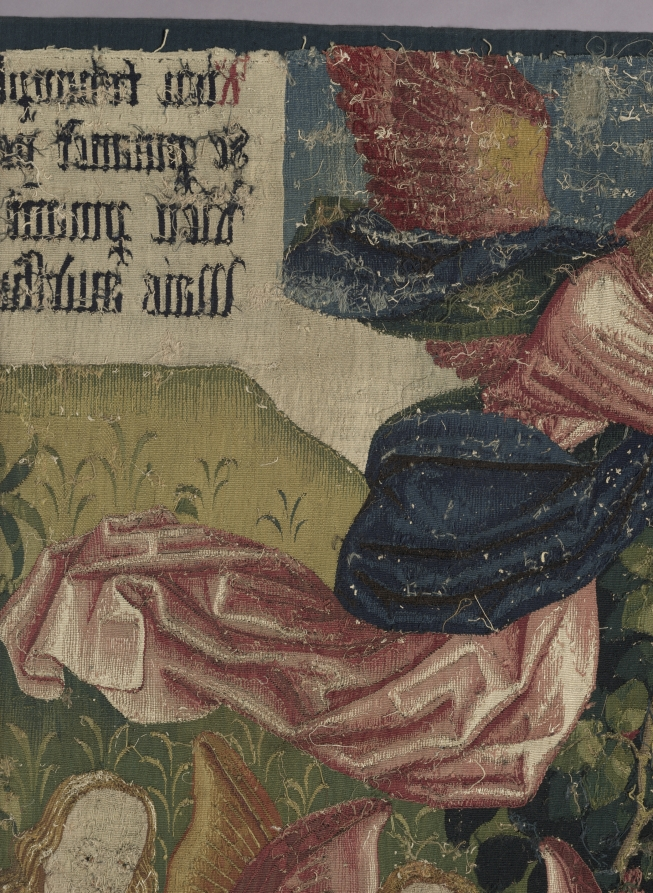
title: The Triumph of Eternity (from Chateau de Chaumont set)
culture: France, Lyon(?), early 16th century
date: 1512–15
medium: silk and wool; tapestry weave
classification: Tapestry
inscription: French verse in Gothic letters translates as follows: "Nothing triumphs by right authority, Unless it be conducted by Eternity. Nothing is permanent beneath the firmament, But above us triumphs Eternity."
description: The Triumph of Eternity is represented by the Coronation of the Virgin. Dressed in crimson velvet with an opulent brocaded velvet shawl, the Virgin is seated in the center as two angels hold a crown over her head. Five musical angels surround her playing an organ, recorder, straight cornetto, harp, and lute, while another sings from an open music book. The scenes in the set display a conservative style in which the figures are placed in shallow landscapes, thereby ignoring pictorial innovations for depicting space and mass. The verse in Old French at the top states: Nothing triumphing by due authority Remains permanent and durable. Nothing is permanent under the heavens, But above, eternity triumphs.